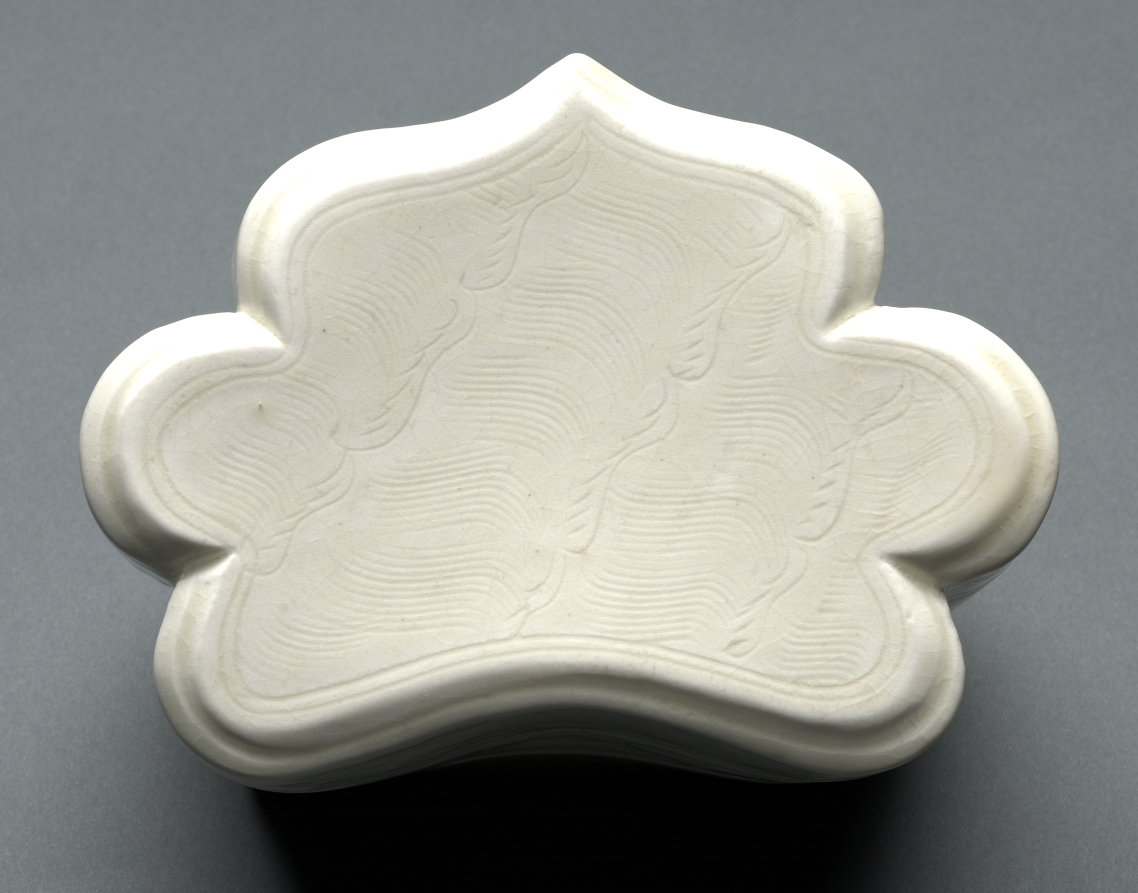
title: Cloud-Collar Pillow with Waves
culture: China, Jiangxi Province, Northern Song dynasty (960–1127)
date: 1000s–1100s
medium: glazed porcelain with incised and carved decoration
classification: Ceramic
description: This ceramic pillow in the form of a cloud—a design pattern variously referred to as ruyi, the shape of a head of an auspicious scepter—is a fine example of qingbai ware from Jiangxi province. It has a pure white body covered with a transparent, glassy glaze that carries a faint greenish tinge, thus giving it another name, yingqing, or "shadow blue." On the surface of the pillow is a carved and incised design of repeating wave patterns. The beauty of this piece lies in its elegance of form, simplicity of design, and delicacy of workmanship.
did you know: While ceramic might not be your choice for a pillow, it actually kept the user cool as they slept.